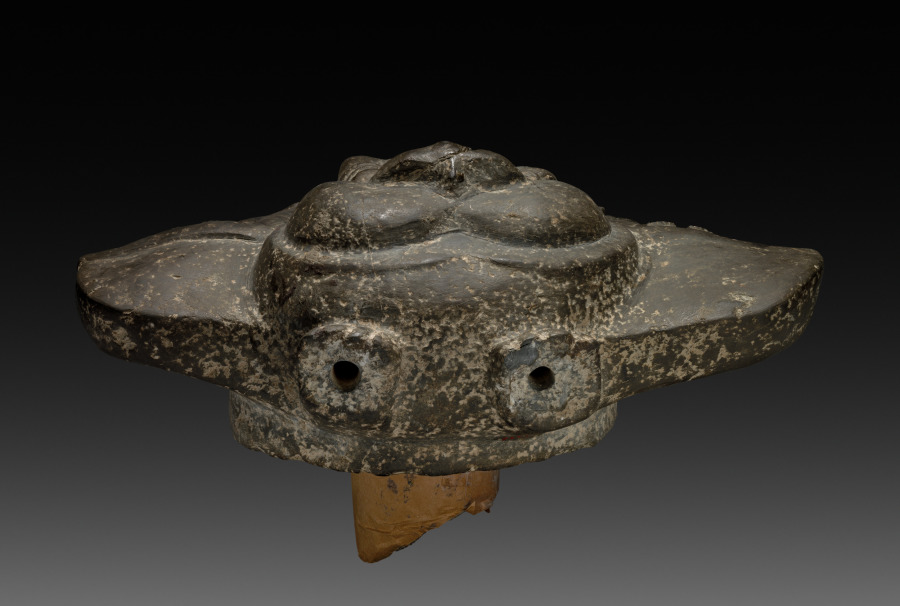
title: Bracket with Buddha and a Pair of Acolytes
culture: Thailand, Mon-Dvaravati style, probably from Nagara Pathama, 8th-9th Century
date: 700s–800s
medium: gray schist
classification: Sculpture